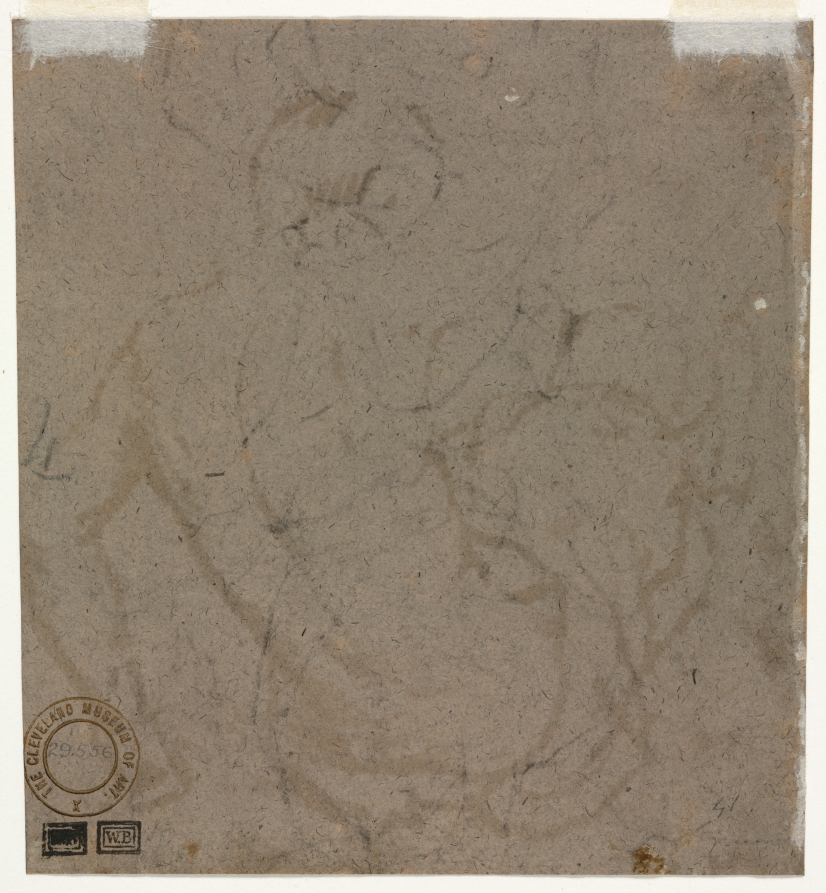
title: Sketch (verso)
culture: Italy, 16th century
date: 1500s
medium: brush and black wash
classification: Drawing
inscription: lower right, in graphite: 41